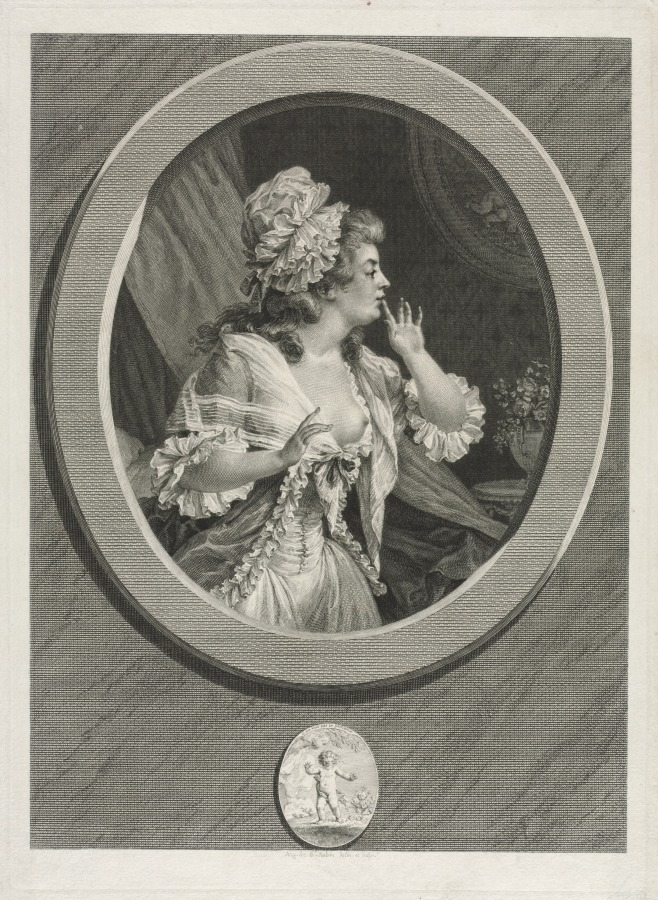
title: At Least Be Discreet and You May Count on Me (pair)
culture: France, 18th century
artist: Augustin de Saint-Aubin (French, 1736–1807)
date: 1789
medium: etching and engraving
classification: Print